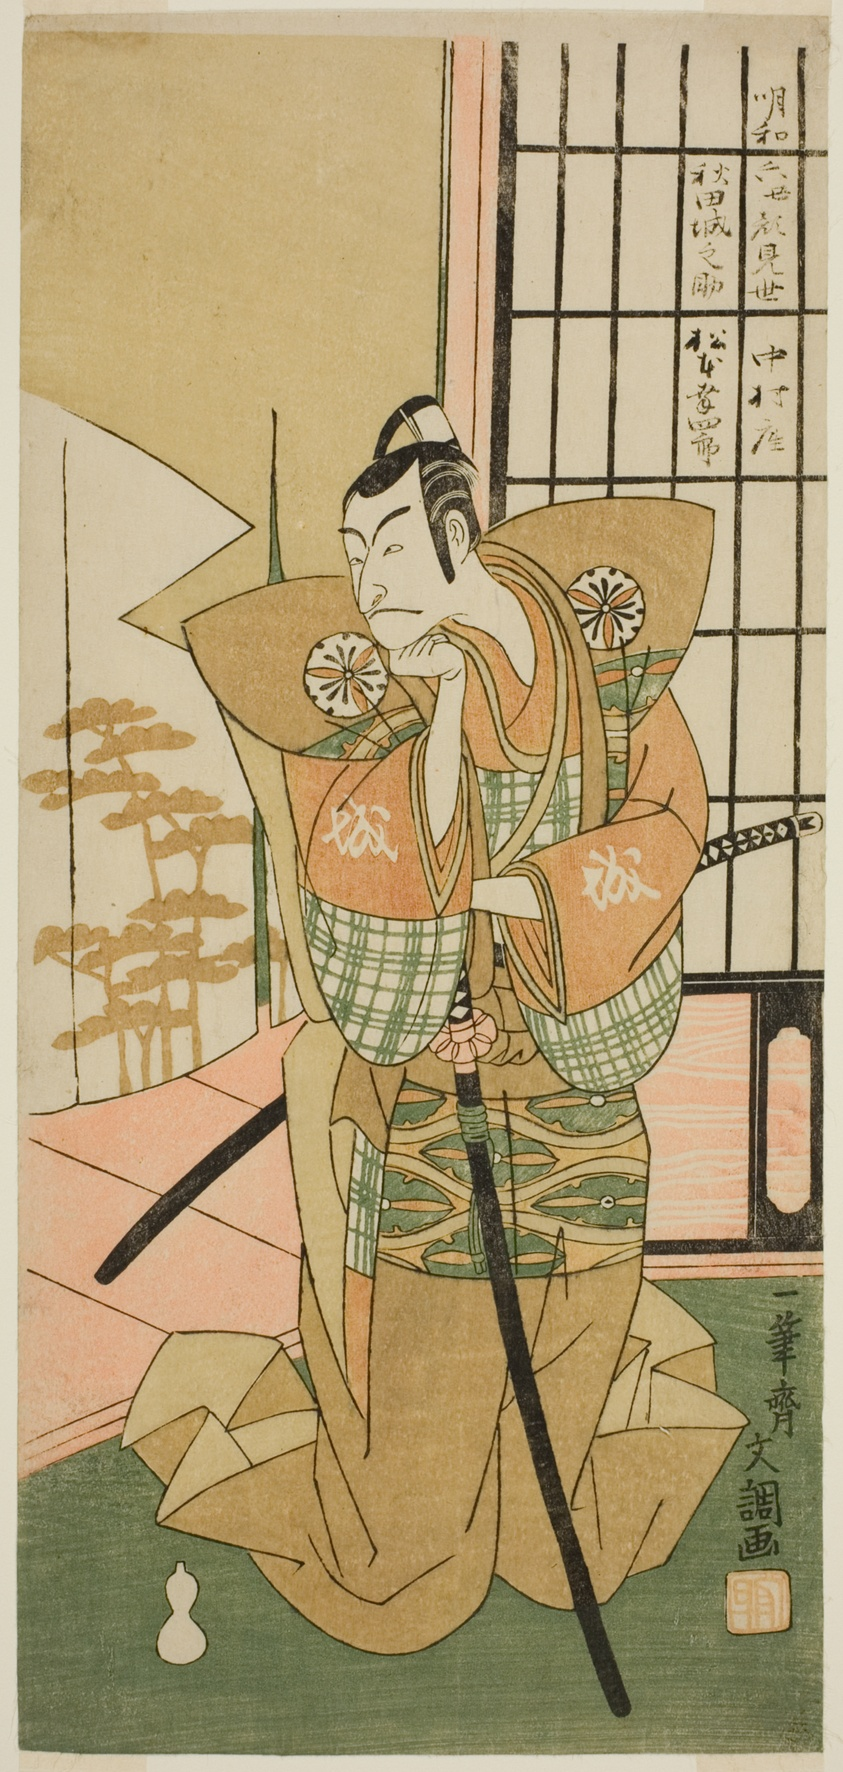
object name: Print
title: The Actor Matsumoto Koshiro III as Akita Jonosuke in the Play Kawaranu Hanasakae Hachi no Ki, Performed at the Nakamura Theater in the Eleventh Month, 1769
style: Japanese (culture or style)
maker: Ippitsusai Buncho (Japanese, active c. 1755-90)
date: c. 1769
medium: Color woodblock print; hosoban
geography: Japan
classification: woodblock print; print; asian art